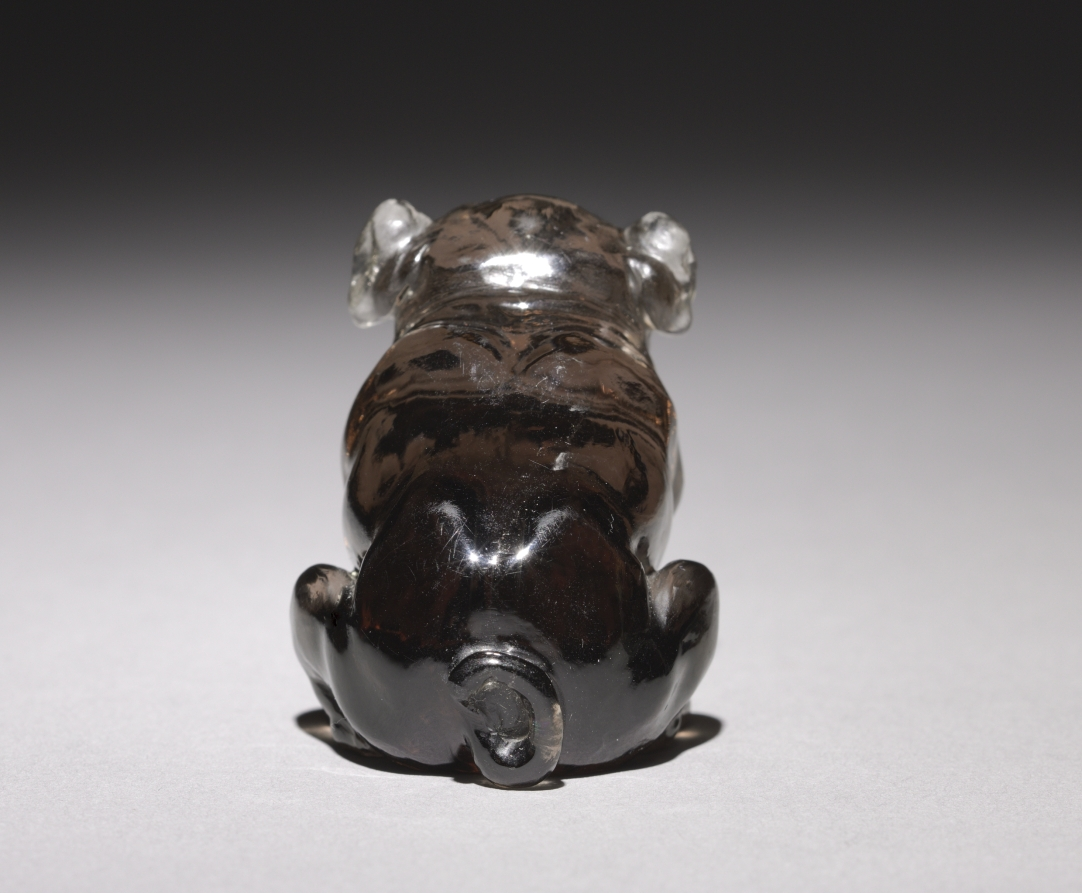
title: Bulldog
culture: Russia, St. Petersburg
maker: House of Fabergé (Russian, 1842–1918)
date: c. 1895–1915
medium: amethystine quartz, diamonds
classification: Miscellaneous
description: In creating luxurious accessories for a desk or tabletop, the House of Fabergé often used native hardstones such as multicolored agate and jasper, green nephrite, pink rhodonite, quartz, and rock crystal found in the Ural Mountains of western Russia. By paying careful attention to the unique colors and textures of the stones, Fabergé and his craftsmen brought them to life, turning smoky quartz into this figure of a seated bulldog, for example. The use of native materials also promoted Russian nationalism, which appealed greatly to the tsar and his family.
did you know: Fabergé's lapidaries carefully chose the stones to resemble the color and texture of the figure they were sculpting. The smoky quartz used for this bulldog was polished to resemble his dark shiny coat.